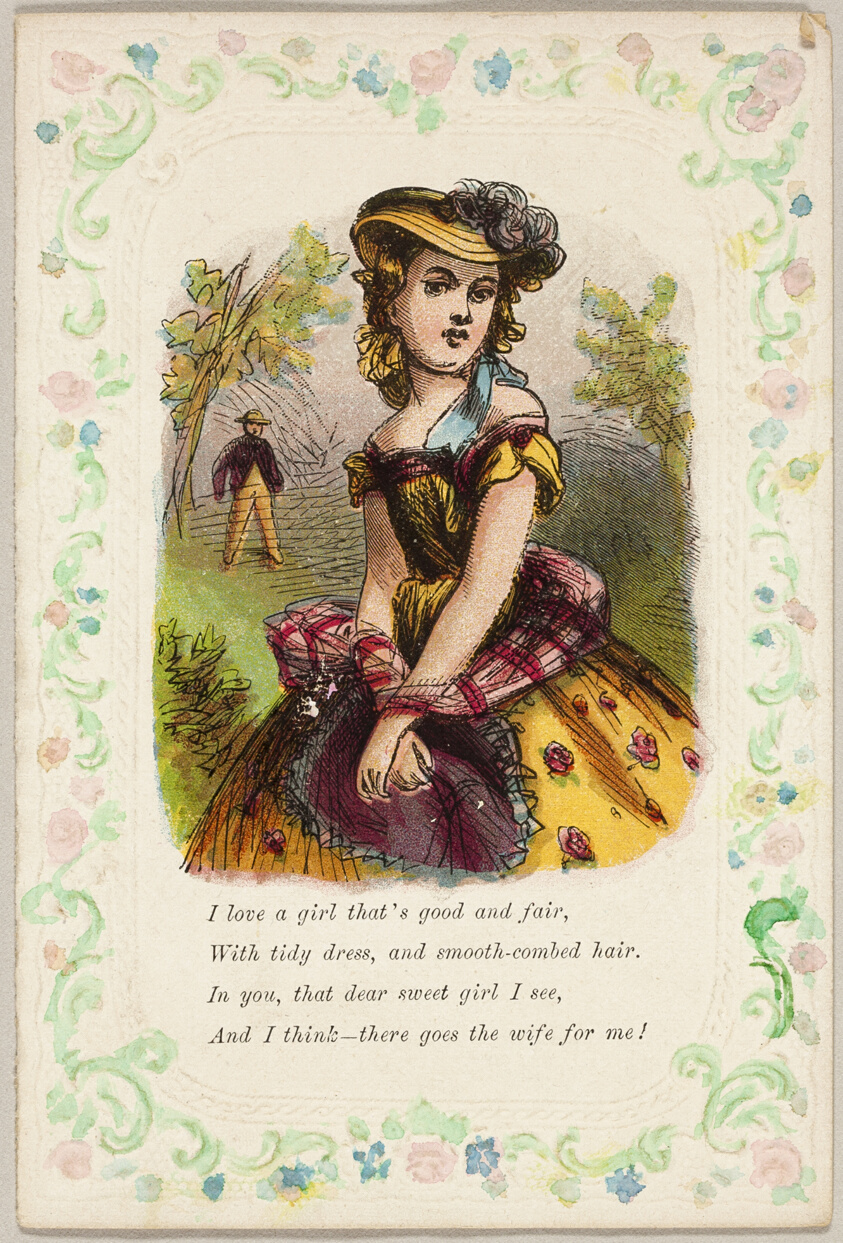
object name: Print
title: I Love a Girl that's Good and Fair (valentine)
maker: Unknown Artist; American, 19th century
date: 1860/69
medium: Lithograph with hand-coloring on embossed ivory wove paper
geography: United States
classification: valentine; prints and drawing; print